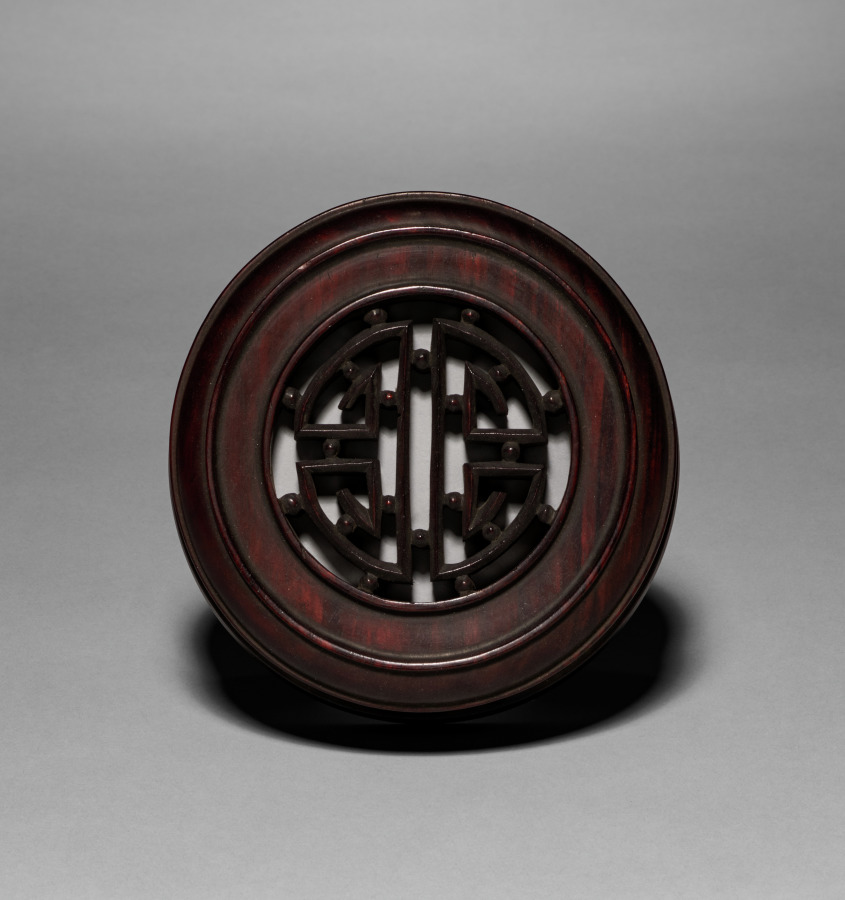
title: Jar (lid)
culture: China, Qing dynasty (1644–1911), Qianlong reign (1736–95)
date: 1736–95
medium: carved wood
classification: Ceramic